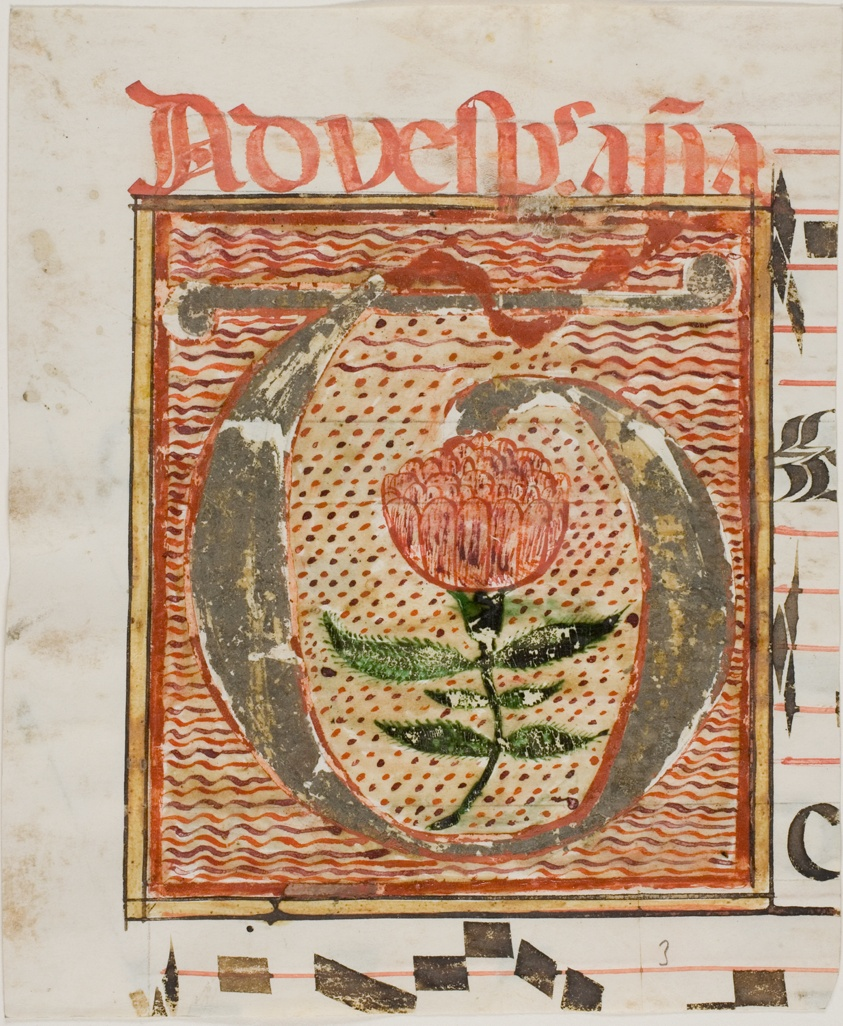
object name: Drawing and Watercolor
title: Decorated Initial "T" with Flower from a Manuscript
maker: European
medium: Manuscript cutting in tempera, colored inks, and silver leaf, with Latin inscriptions in brownish black and red inks, ruled in red, on vellum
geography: Europe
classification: tempera; drawings (visual works); prints and drawing